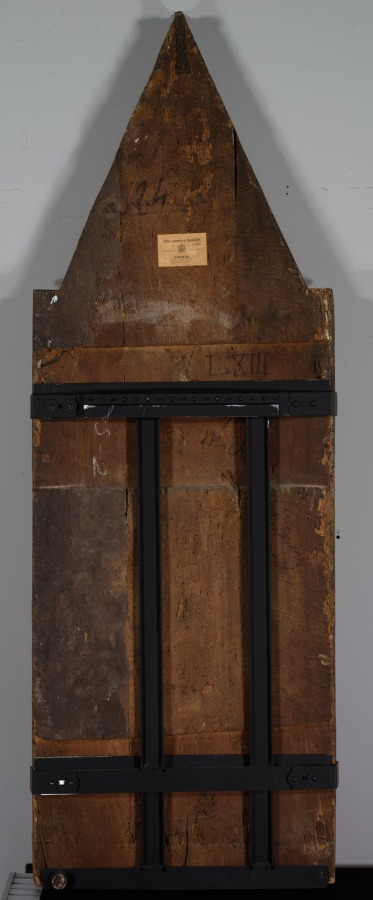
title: Virgin and Child Enthroned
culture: Italy, Tuscany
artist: Battista di Biagio Sanguigni (Italian, active 1393–1451)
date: 1419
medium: tempera and gold on wood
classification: Painting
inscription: Inscribed at bottom: "QUESTA TAVOLA AFATO FARE ANTONIO DI DOMENICHO / GIUGNI P[ER] RIMEDIO DELA SUA ANIMA ANI DNO. MCCCCXVIIII"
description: Rather than depicting a single moment in time, this gold-ground painting symbolically encapsulates Christ. Seated on a rich throne, the monumental Virgin holds the Christ child. Above, the risen Christ is seen in heaven holding a book, inscribed with the alpha and omega, the first and last letters of the Greek alphabet, signifying Christ’s role as the beginning and end of all things. The Italian inscription states: "This painting was made for Antonio di Domenicho Giugni for the repose of his soul, the year of our Lord 1419." In the 1300s, Italian painting focused on the heavenly aspects of Christian faith in order to convey abstract religious concepts. Depicted as specimens of formal beauty, sacred figures were placed against an ethereal gold background. Within a hundred years, artists began to highlight the earthly aspects of sacred figures, placing them within naturalistic landscapes. In this newer style of painting, the approachability of sacred figures fostered devotion among the faithful.